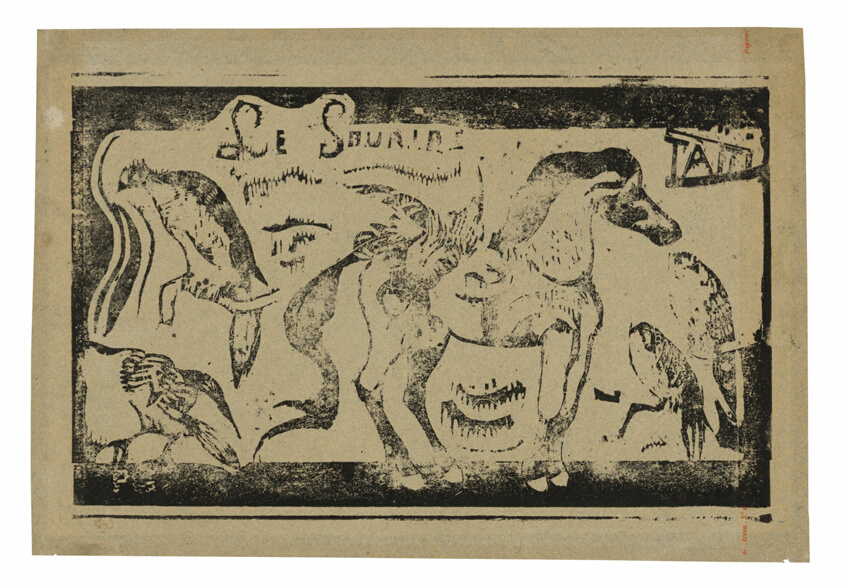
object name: Print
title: A Horse and Birds, headpiece for Le sourire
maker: Paul Gauguin (French, 1848-1903)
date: 1899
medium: Wood-block print in black ink on mottled gray-blue wove paper, laid down on buff wove paper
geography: France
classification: woodcut; print; prints and drawing